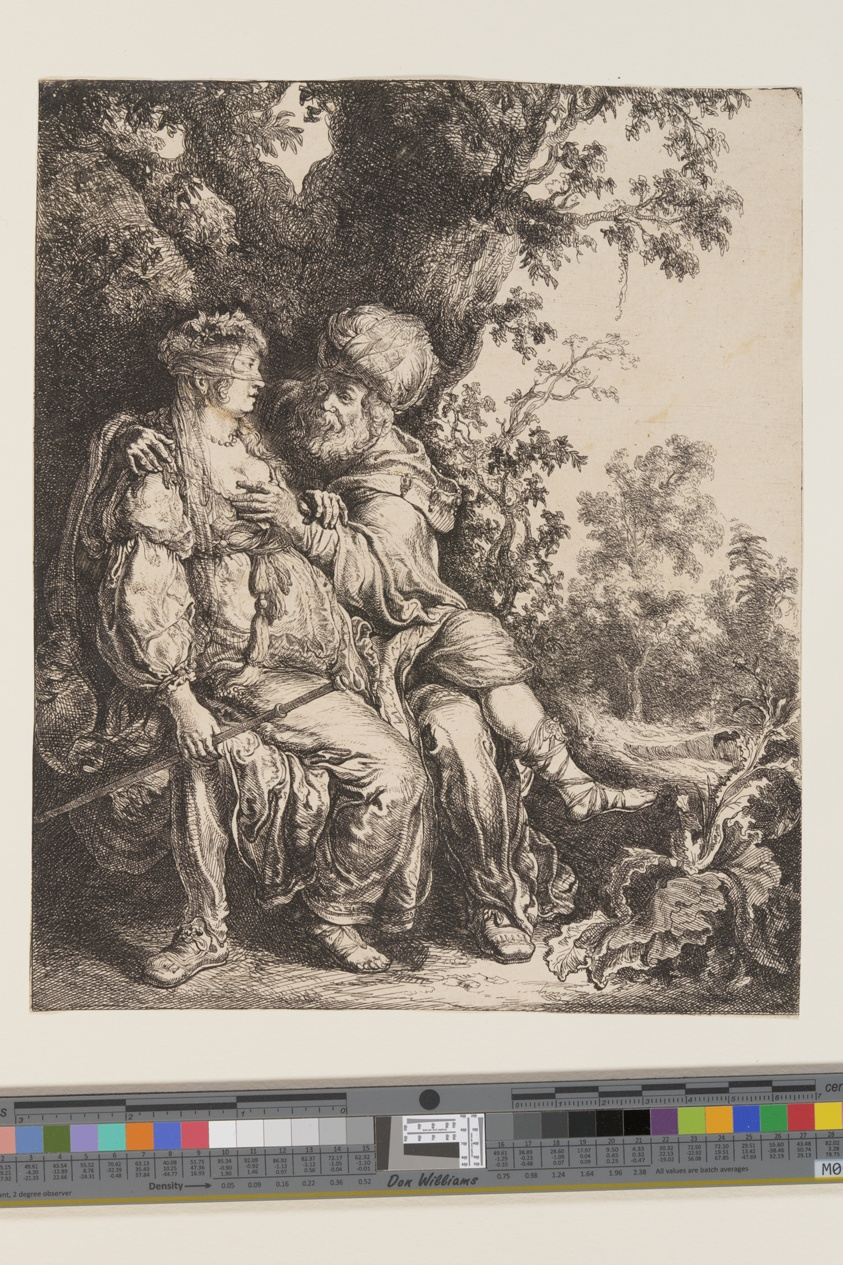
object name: Print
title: Judah and Tamar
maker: Pieter Lastman (Dutch, 1583–1633)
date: c. 1620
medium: Etching on ivory laid paper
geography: Netherlands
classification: print; paper; prints and drawing; etching